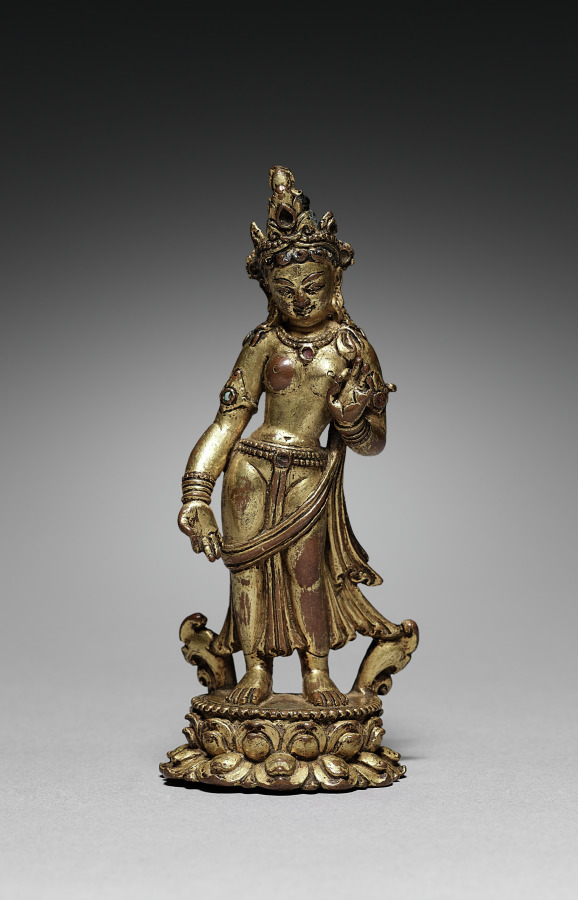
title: Standing Tara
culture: Nepal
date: 1300s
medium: bronze, gilded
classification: Sculpture